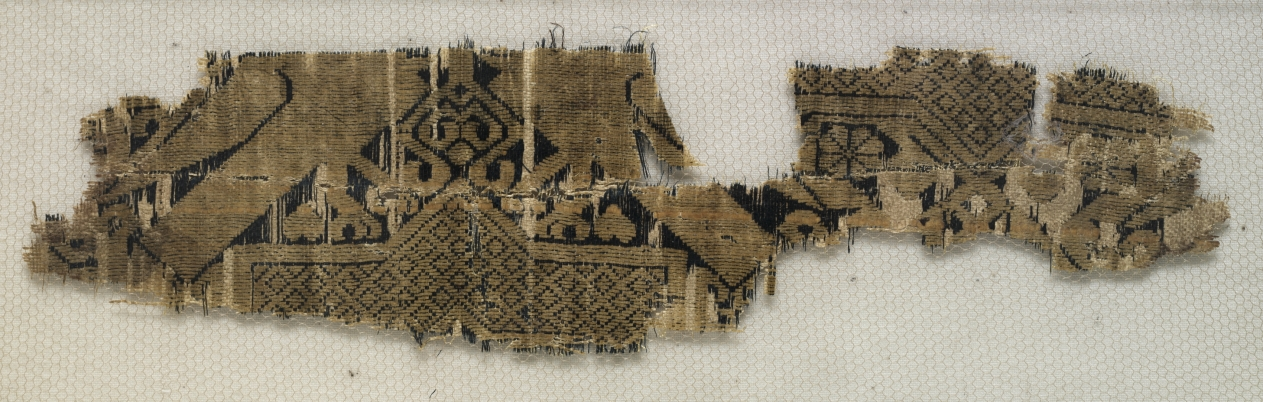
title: Textile Fragment with Portions of Eight-Pointed Star and Birds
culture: Syria, Ayyubid period (1171–1260)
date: 1000s–1100s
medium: silk: lampas weave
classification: Textile